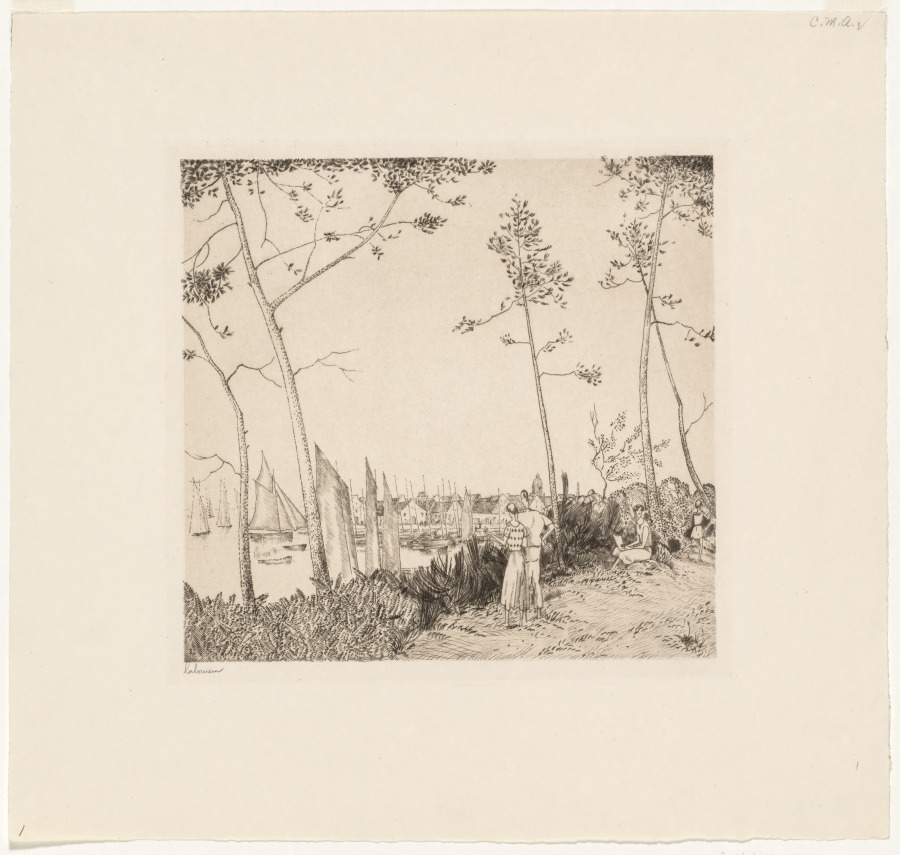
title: La Promenade sur le Port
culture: France, 20th century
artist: Jean-Émile Laboureur (French, 1877–1943)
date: 1935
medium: etching and line engraving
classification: Print